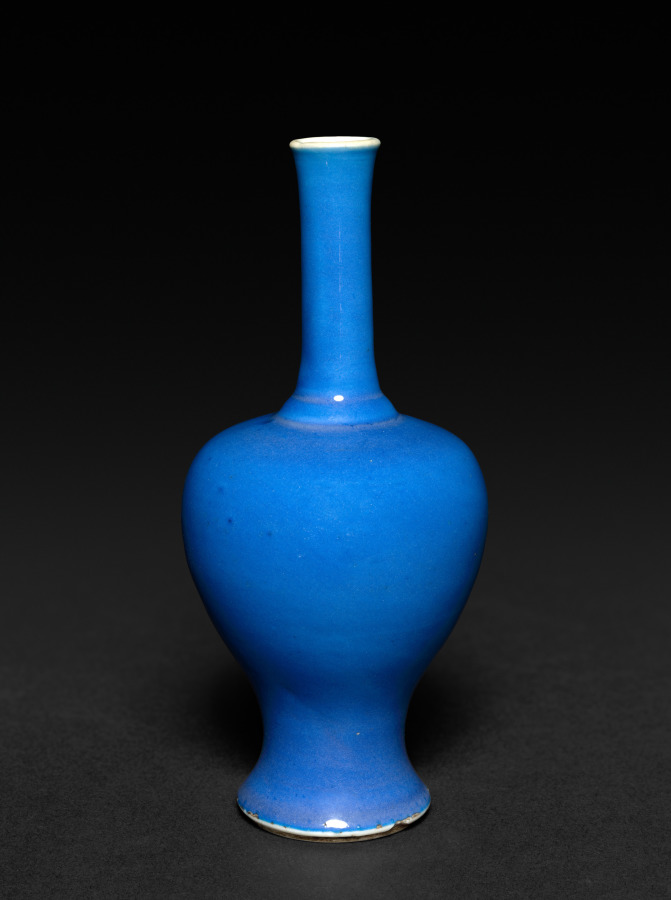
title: Miniature Vase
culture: China, Qing dynasty (1644-1911), Kangxi reign (1662-1722)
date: 1662–1722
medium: porcelain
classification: Ceramic